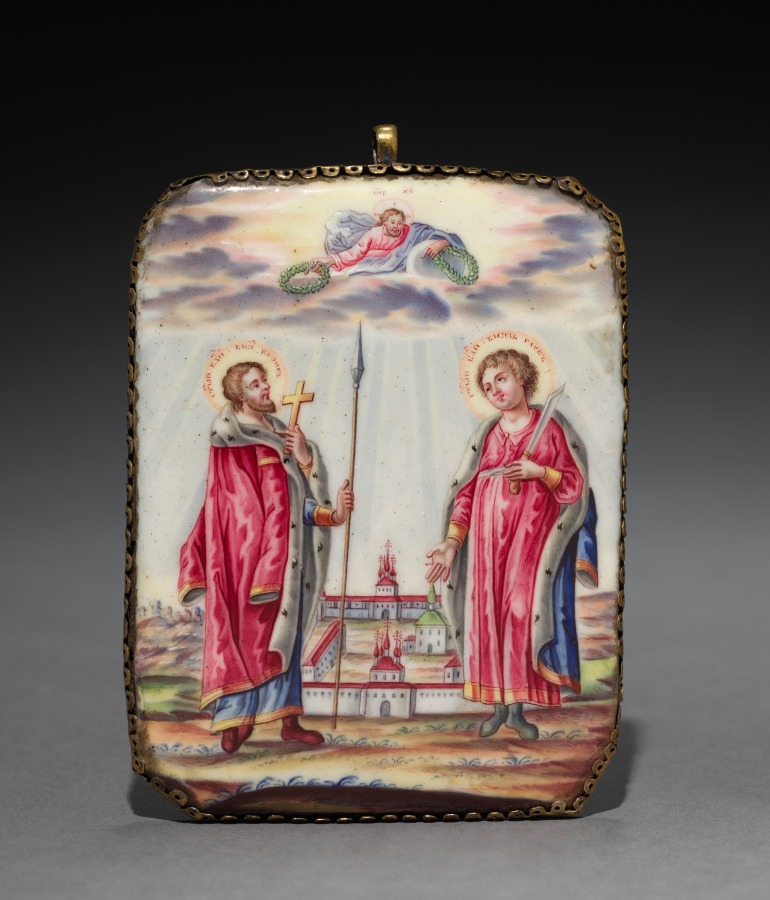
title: Icon of Saints Boris and Gleb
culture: Russia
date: 1700s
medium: enamel on copper, mounted in silver gilt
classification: Enamel